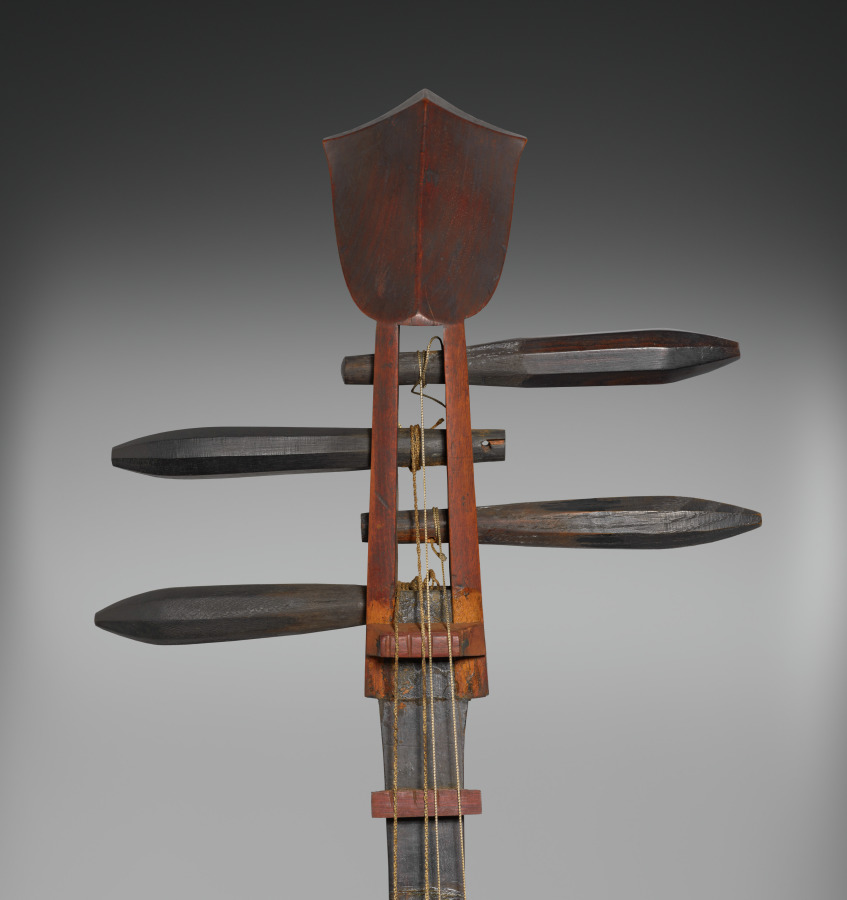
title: Heike Biwa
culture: Japan, Meiji period (1868–1912)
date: c. 1850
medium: Wood, bone, silk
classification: Musical Instrument